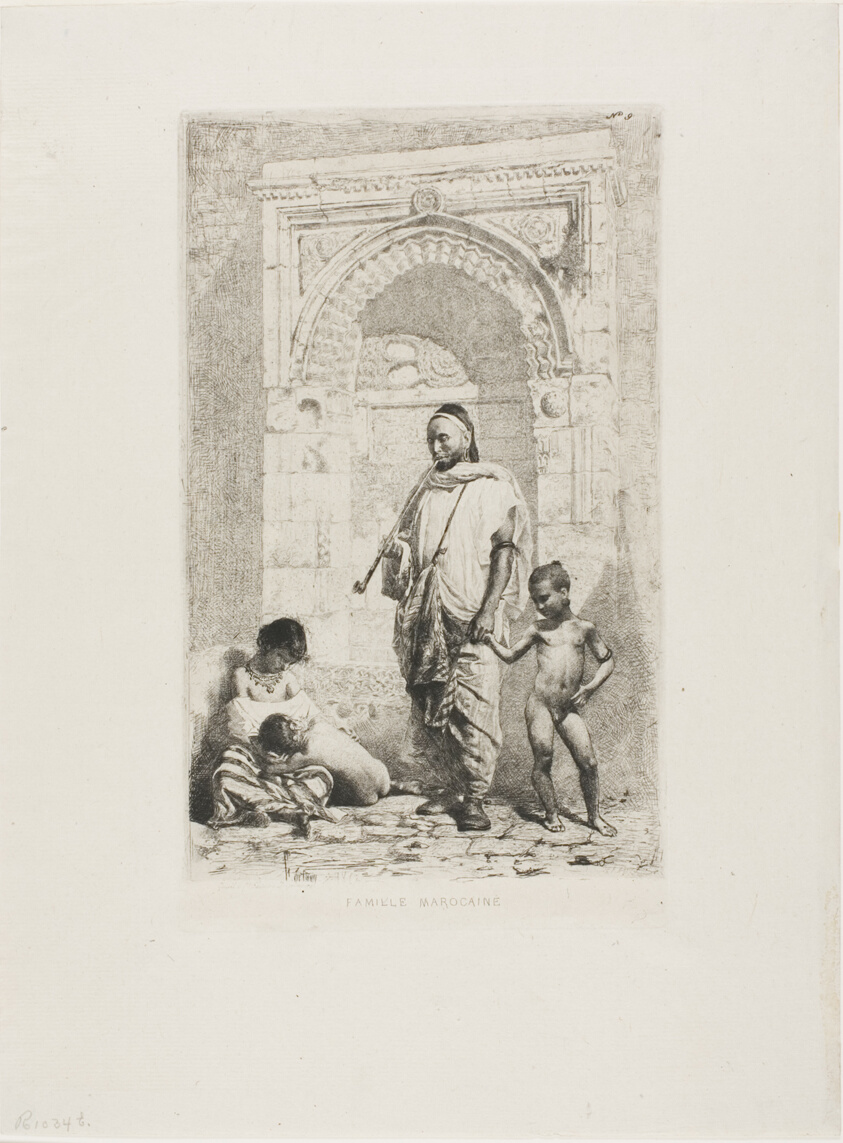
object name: Print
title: Moroccan Family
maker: Mariano José María Bernardo Fortuny y Carbó; Spanish, 1838-1874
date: 1862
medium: Etching on paper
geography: Spain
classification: etching; print; prints and drawing